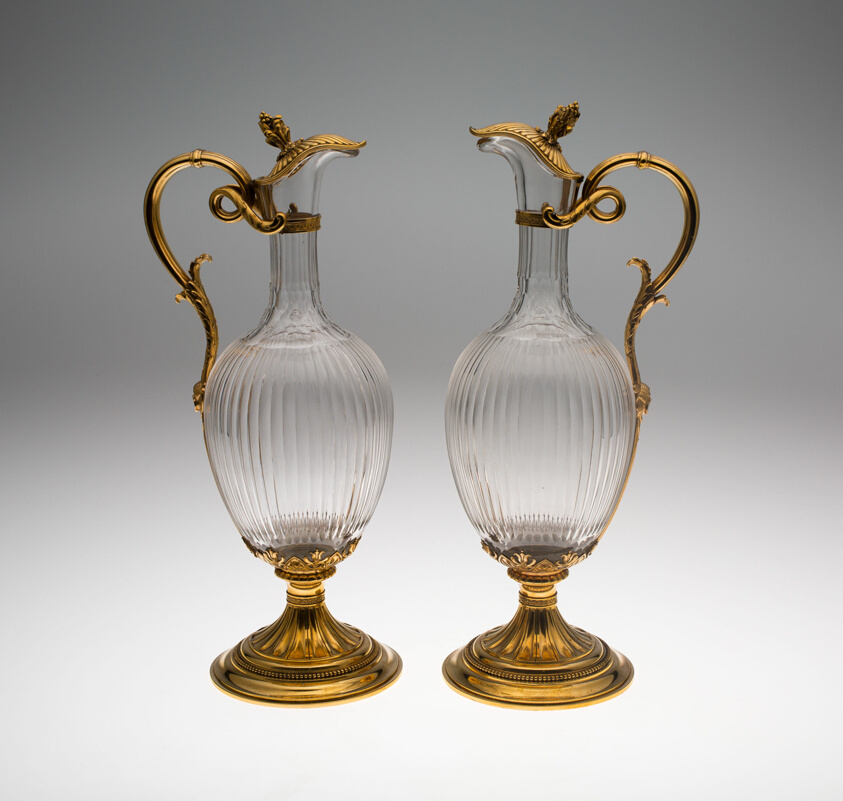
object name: Glass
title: Pair of Ewers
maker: Fabergé Workshop; Russian, 1842-1917; Made by Julius Alexandrovitch Rappoport (Russian, 1864-1916)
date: 1896/1908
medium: Glass with silver gilt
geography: Saint Petersburg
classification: ewer (vessel); vessel; glass; european decorative arts